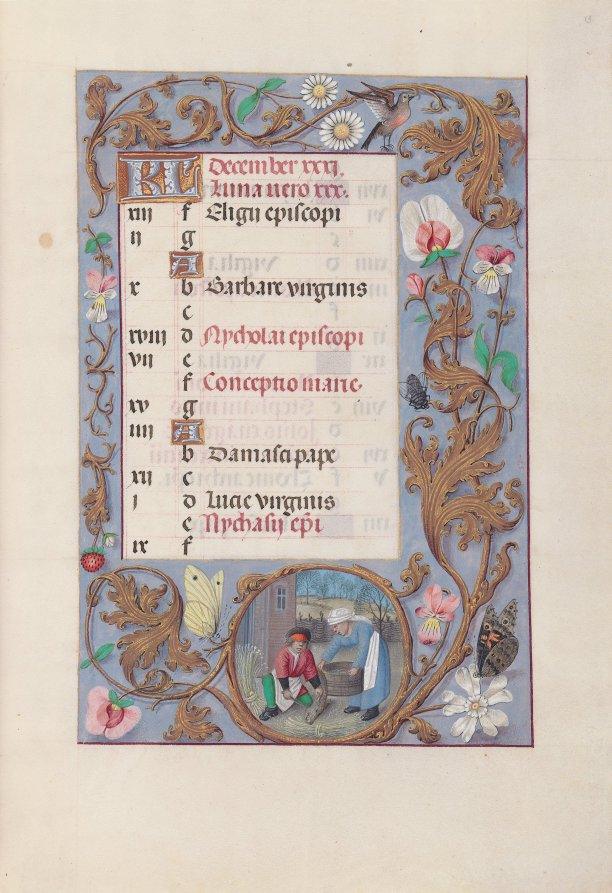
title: Hours of Queen Isabella the Catholic, Queen of Spain: Fol. 13r, December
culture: Flanders, Ghent and Bruges, late 15th century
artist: Master of the First Prayerbook of Maximillian (Flemish, c. 1444–1519)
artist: and Associates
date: c. 1500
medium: ink, tempera, and gold on vellum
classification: Bound Volume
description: This manuscript was illuminated by a circle of at least five highly organized manuscript painters active in the Flemish cities of Ghent and Bruges. The principal illuminator was Alexander Bening, who painted the majority of the book's miniatures. Manuscripts produced by this circle of artists are renowned for the decoration of their borders, which typically feature a rich variety of realistically-painted flowers, birds, and butterflies. This prayer book, called a book of hours, was intended not for a cleric, but for the private devotions of a lay person-in this case, Isabella the Catholic, Queen of Spain (1451-1504). Isabella's coat of arms embellishes the book's frontispiece. It is unlikely that the book was commissioned by the Queen herself; rather, she probably received it as a diplomatic gift from someone courting her patronage, perhaps Cardinal Francisco Jimenez de Cisneros. A Franciscan friar, Jimenez was dependent upon Isabella for his advancement, first to the post of Queen's confessor in 1492, and then to Archbishop of Toledo in 1495.